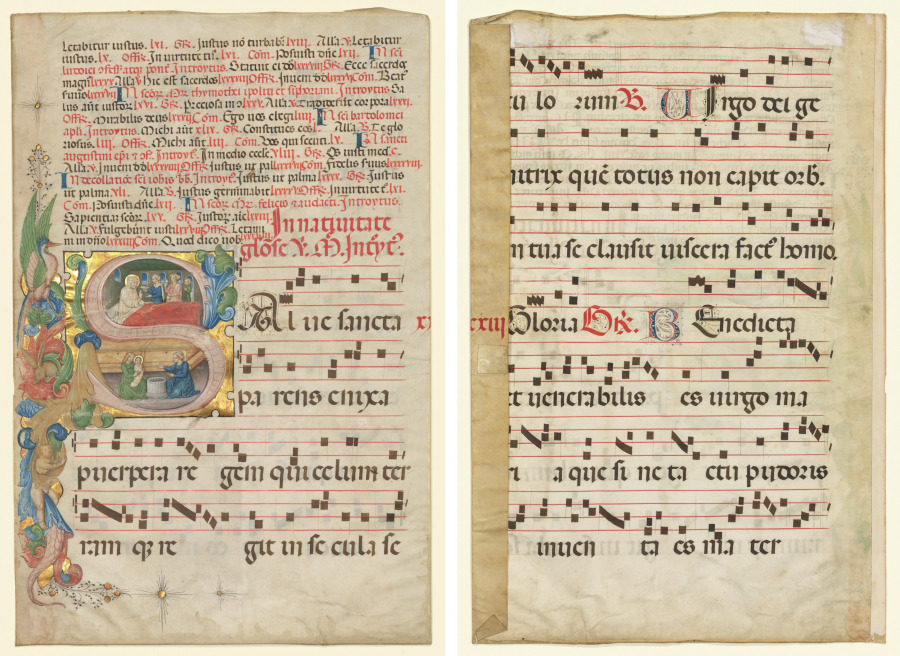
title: Leaf from a Gradual: Historiated Initial S[alve Sancta Parens] with Birth of the Virgin (recto) and Music (verso)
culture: Northern Italy, 15th century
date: c. 1420–50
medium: ink, tempera, and gold on vellum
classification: Manuscript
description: This beautiful leaf is dominated by a large historiated S from which sprays of foliage inhabited by a putto, a rabbit, and a stork extend into the left margin. A scene representing the birth of the Virgin is within the double curve of the S. Saint Anne, the Virgin’s mother, occupies the birthing bed in the upper scene. Below, the infant Mary has been bathed and wrapped in swaddling clothes. In manuscript missals and their musical counterparts, the gradual, votive masses are generally assigned one to each day of the week with Saturday reserved for the Blessed Virgin. The votive Mass to the Virgin varied from season to season. Three masses were, therefore, supplied—one for advent, one to be used from Christmas to purification, and a third, represented by this leaf, to be used from purification to advent. This text reads: Salve sancta parens (“Hail Holy Parent”) introducing the opening of the introit for the Saturday votive Mass for the Nativity of the Virgin (September 8) in the liturgical calendar. The identity of the artist remains elusive, as does his precise place of origin. The figure style and ornament suggest a source in North Italy, perhaps in an artistic center such as Pavia, Mantua, or Padua.